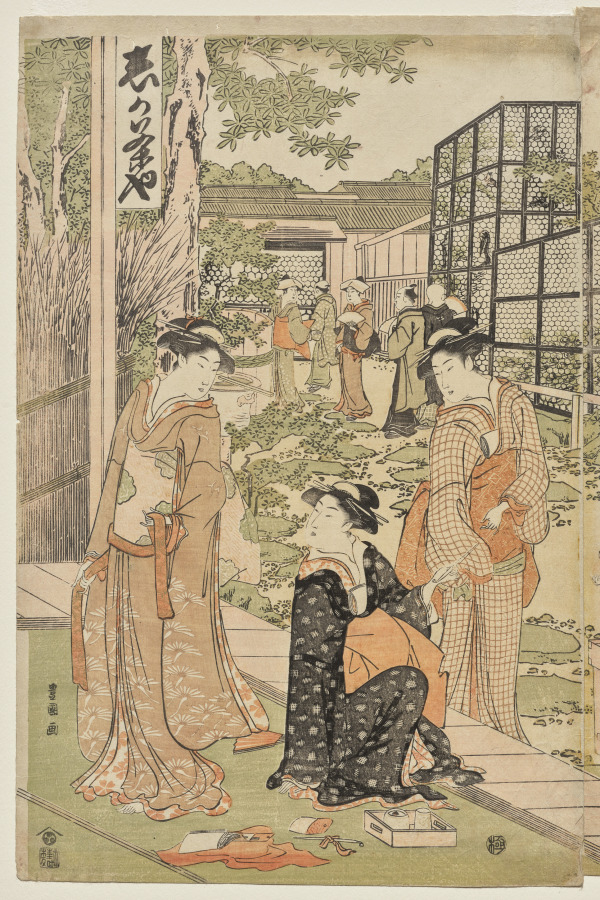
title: The Shika Teahouse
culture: Japan, Edo period (1615–1868)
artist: Utagawa Toyokuni (Japanese, 1769–1825)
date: early 1790s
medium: One of a triptych of color woodblock prints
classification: Print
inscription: Signature: Toyokuni ga Publisher: Nishimuraya Yohachi (Eiju han, emblem) Censorship Seal: kiwame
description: Exotic birds and tobacco—Western imports—feature in this composition. Peacocks and parrots were brought to Japan by Dutch traders in the 1700s. Many of the visitors to this teahouse, which specialized in displays of foreign birds, admire the unusual fowl while sipping tea and smoking long pipes. The birds have attracted curious courtesans, entertainers, samurai, merchants and their wives, and even a Buddhist monk.